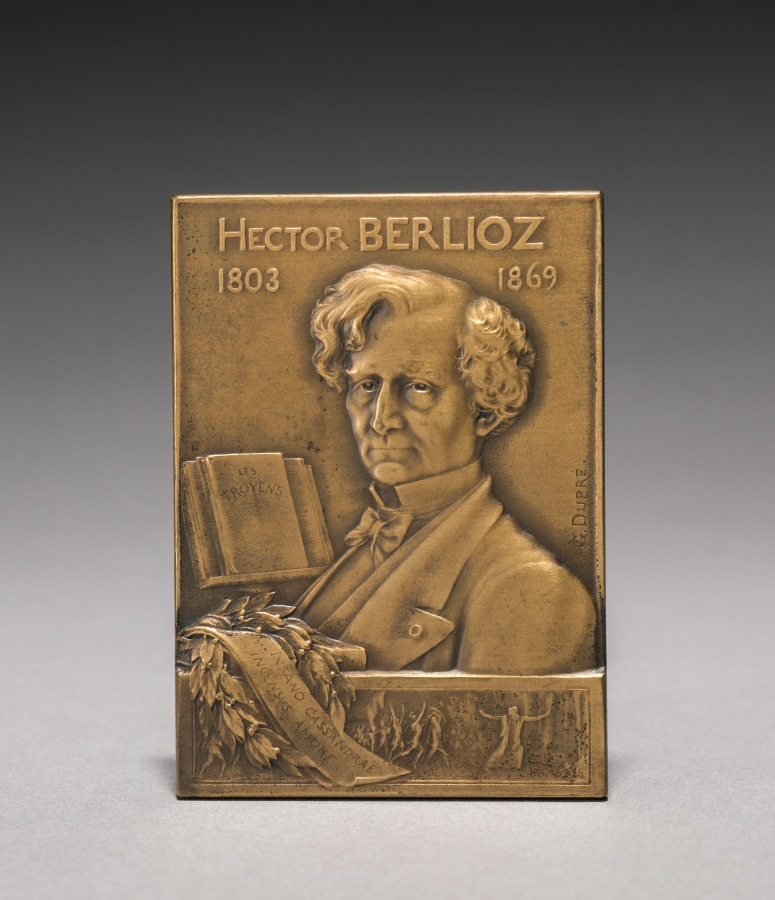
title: Medallion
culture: France, early 20th century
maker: Georges Dupré (French, 1869-1909)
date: 1903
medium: bronze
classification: Metalwork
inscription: "Grenoble et la côte-saint-andré à Hector Berlioz"; signed: "G. Dupré."